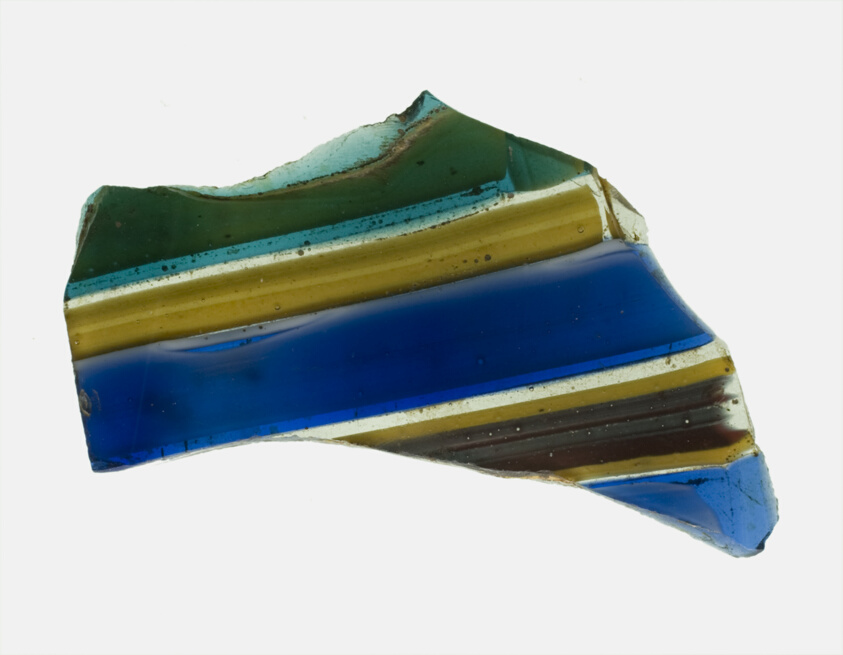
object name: Decorative Arts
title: Bowl Fragment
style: roman (ancient, style or period), ancient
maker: Roman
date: 1st century BCE-1st century CE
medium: Glass, ribbon technique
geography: Roman Empire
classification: fragment; bowl; decorative arts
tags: decoration